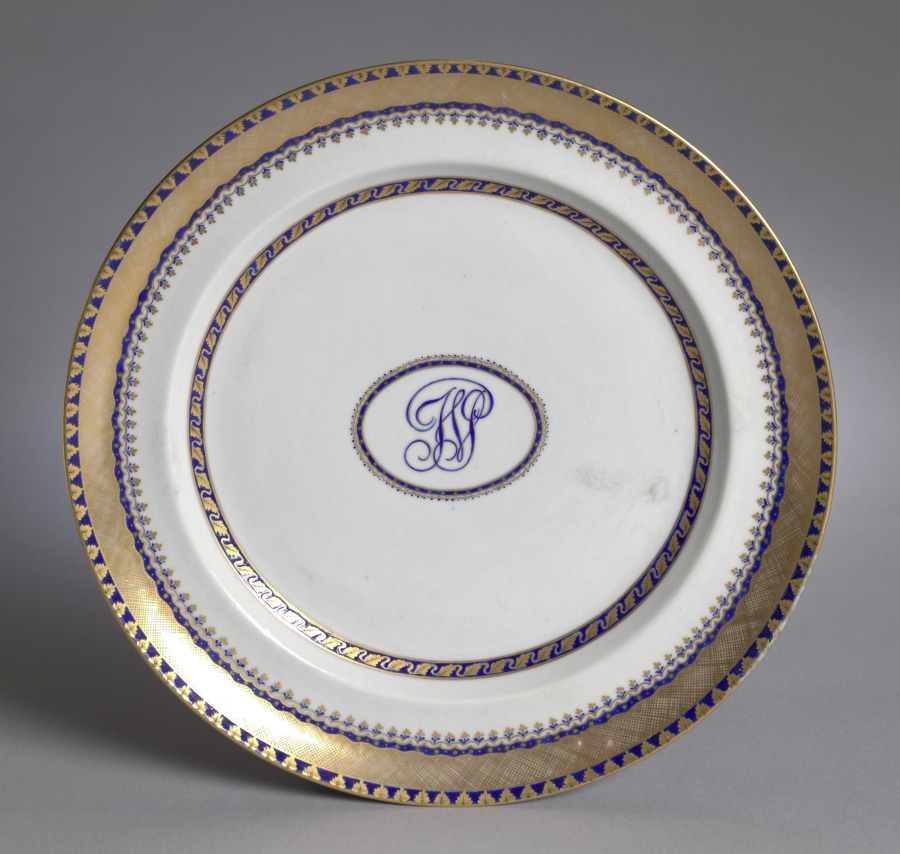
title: Dinner Plate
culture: China, Chinese Export, 18th century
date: 1785–1800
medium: porcelain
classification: Ceramic